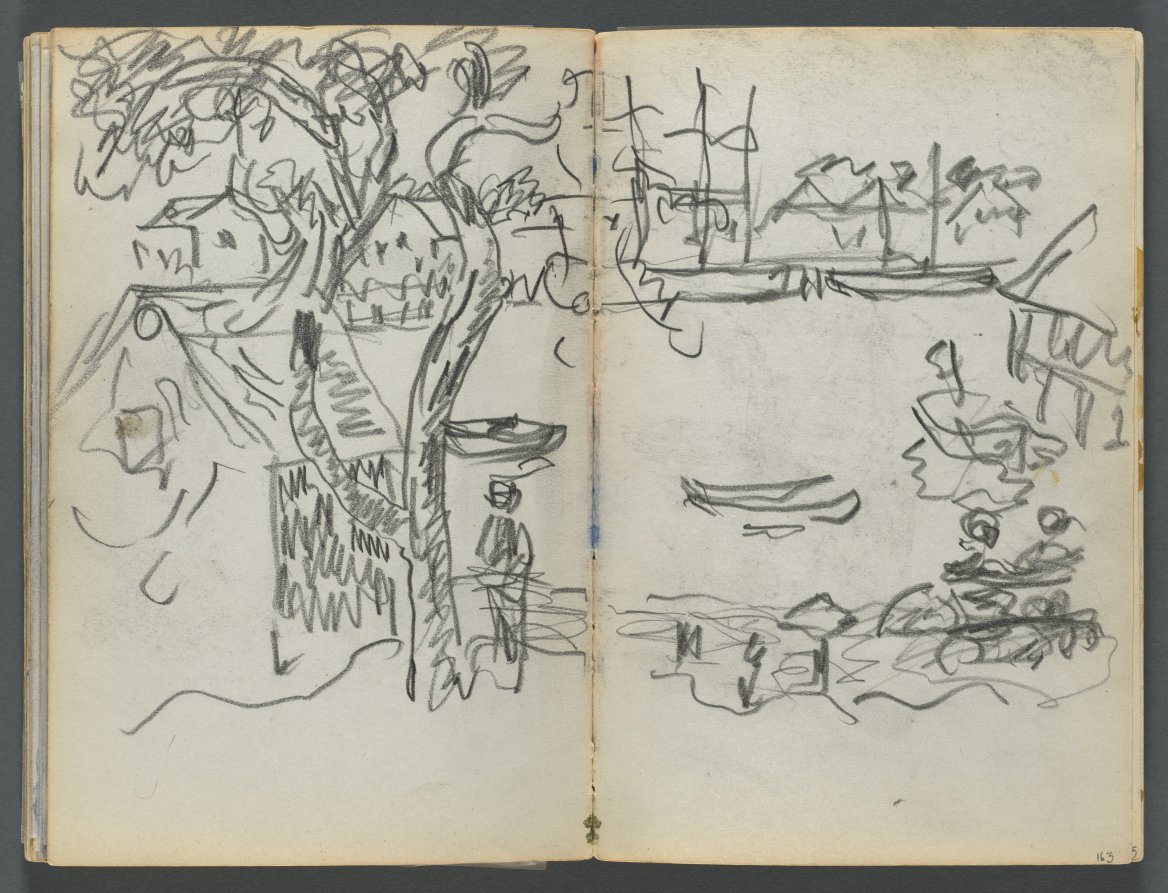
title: Sketchbook, The Dells, N° 127, page 162 & 163: Harbor View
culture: America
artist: Maurice Prendergast (American, born Newfoundland [now Canada], 1858–1924)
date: c. 1919–1921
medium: graphite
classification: Bound Volume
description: This sketchbook contains 59 pages of graphite drawings and 16 watercolors made at various locations on Cape Ann, Massachusetts.